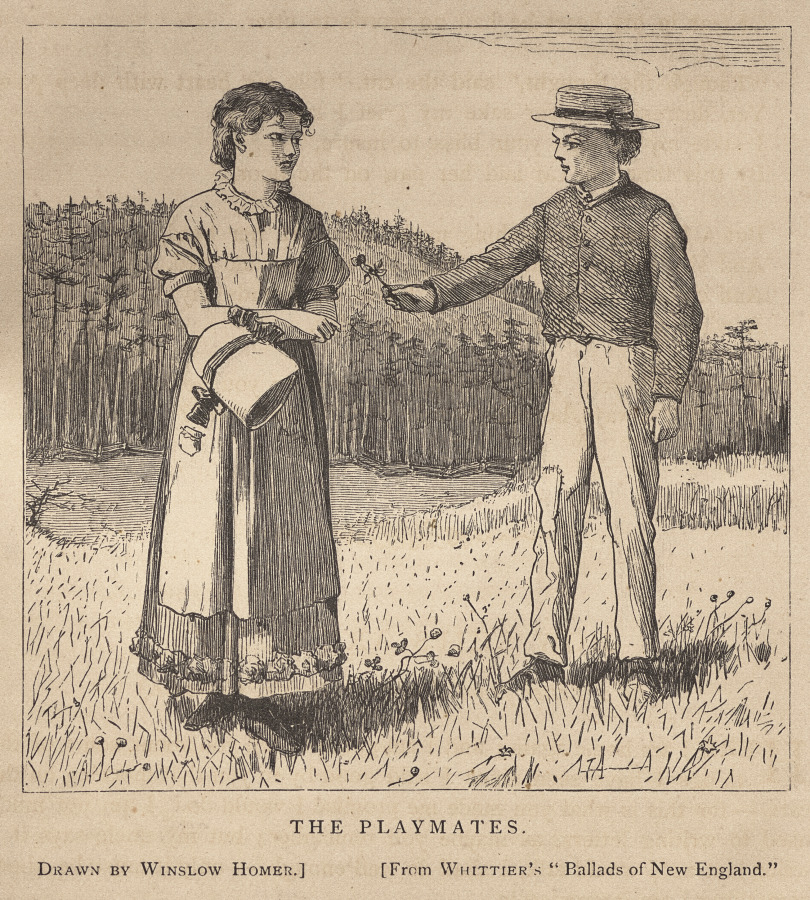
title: The Playmates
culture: America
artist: Winslow Homer (American, 1836–1910)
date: 1869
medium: wood engraving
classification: Print